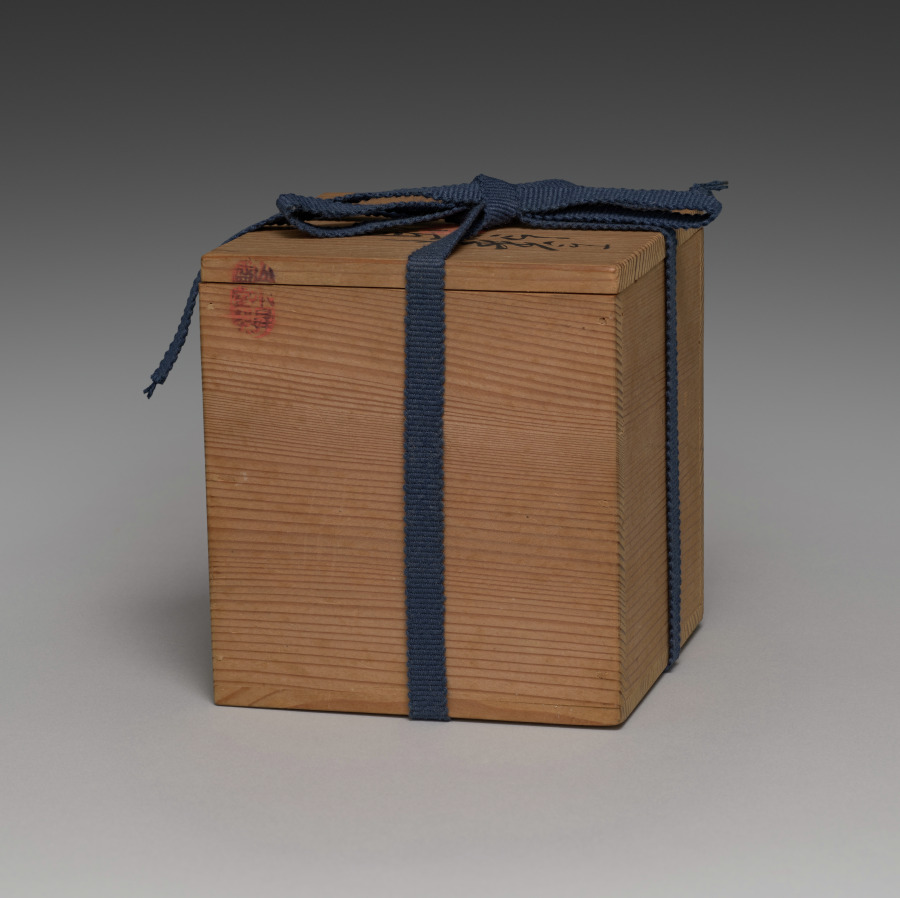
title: Teapot with Pines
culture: Japan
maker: Seifū Yohei III (Japanese, 1851–1914)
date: 1893–1914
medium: Porcelain with underglaze blue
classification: Ceramic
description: Side-handled teapots known as kyūsu and hot water coolers, or yuzamashi, are essential components of sencha tea sets. The teapot is, of course, meant for steeping and serving the tea. Yuzamashi are used to cool boiled water to the ideal temperature for the type of tea to be brewed. This teapot has a pine in underglaze blue on each side. The tip of one of these pines reaches onto the tiny lid, and as with the trees on the Water Cooler with Pines, CMA 2022.163, the trunks are curvy ribbons with little definition. Considering the execution of the two vessels' designs, one might imagine the pot and cooler to have been part of the same set.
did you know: This teapot with images of pines are among Seifū Yohei III’s designs painted in blue.